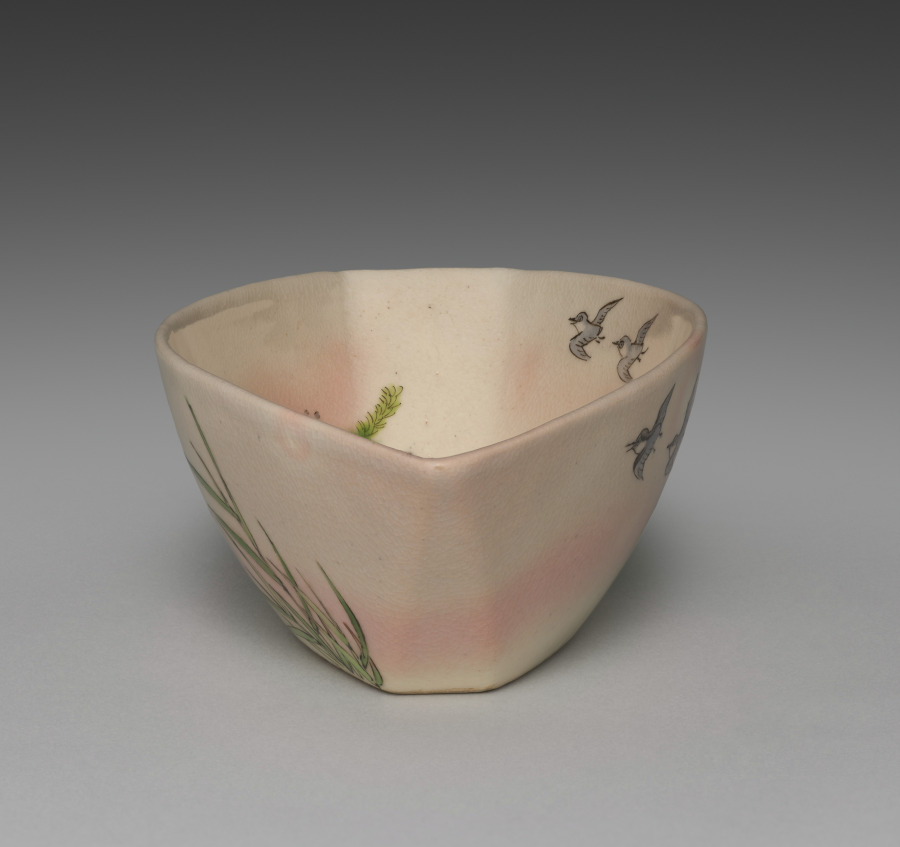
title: Boat-Shaped Bowl with Plovers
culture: Japan, Meiji period (1868–1912)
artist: Seifū Yohei III (Japanese, 1851–1914)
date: 1893–97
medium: Stoneware with crackled glaze and overglaze color enamel and gold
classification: Ceramic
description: Overglaze color enamels create a seascape made complete by the bowl’s boat shape. The bowl’s form inserts a human presence into the scene, much in the way rusu mōyō is used in paintings to suggest people just out of view. Rusu mōyō is a pictorial device by which the presence of someone physically absent from an image is conveyed through the depiction of clothing or other items. The inside of the bowl has a scene of plovers flying through the sky over a profusion of seaweed in sand below. In addition to the black, gray, and green of the overglaze elements, warm pink banding and mottling in the clay come through the glaze and are remarkably effective at suggesting the seashore.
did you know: On the outside of the bowl, on each side, birds fly about grasses in search of a meal.